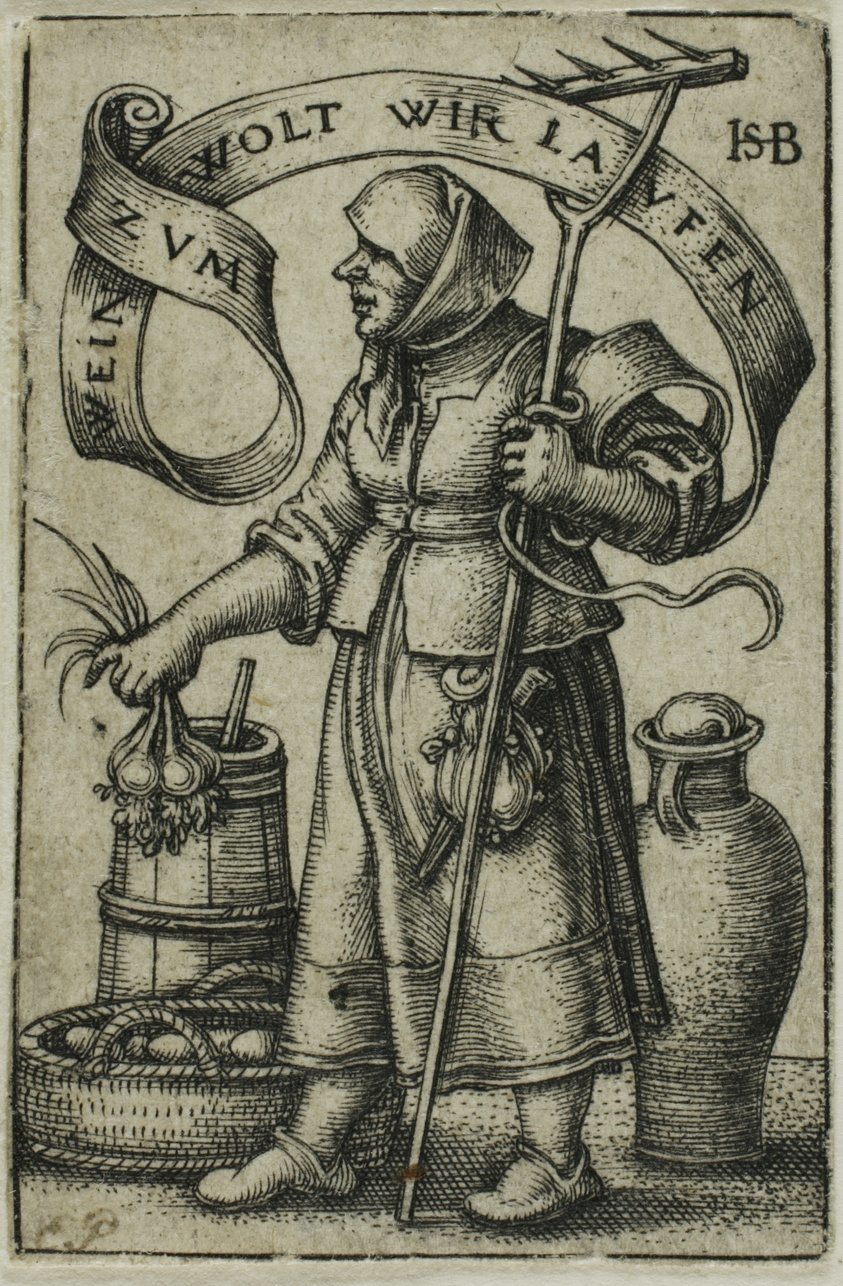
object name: Print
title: The Market Woman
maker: Sebald Beham; German, 1500-1550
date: c. 1542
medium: Engraving in black on ivory laid paper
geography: Germany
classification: engraving; print; prints and drawing